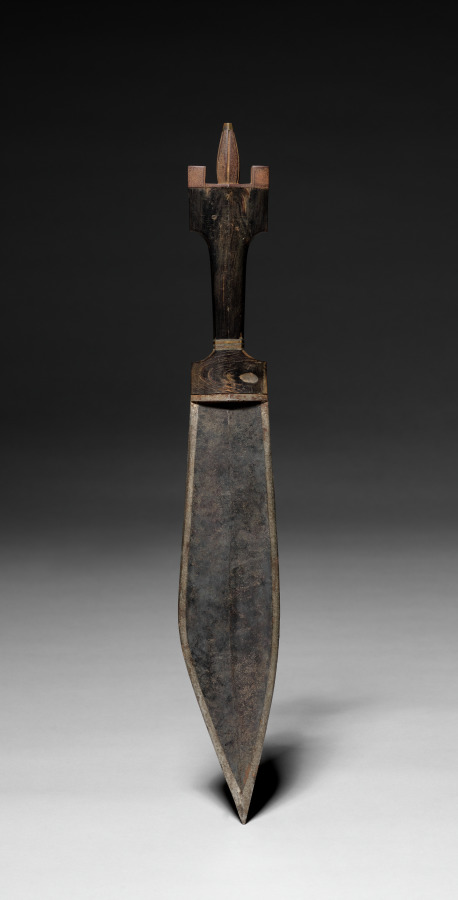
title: Knife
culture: Africa, East Africa, Somalia, unknown maker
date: early 1900s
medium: Iron and horn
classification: Arms and Armor